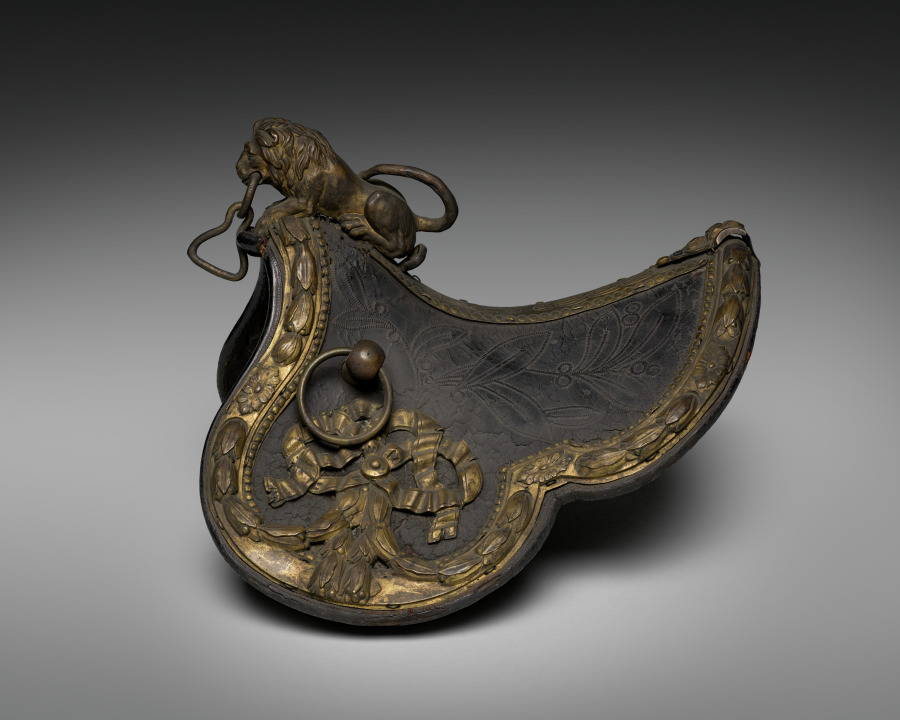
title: Child's Harness Saddle with Lion Pommel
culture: France, 17th century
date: 1600s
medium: leather, tooled with wood, canvas and steel on a brass frame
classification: Arms and Armor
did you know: This child-sized harness saddle was said to have been used in a riding school.